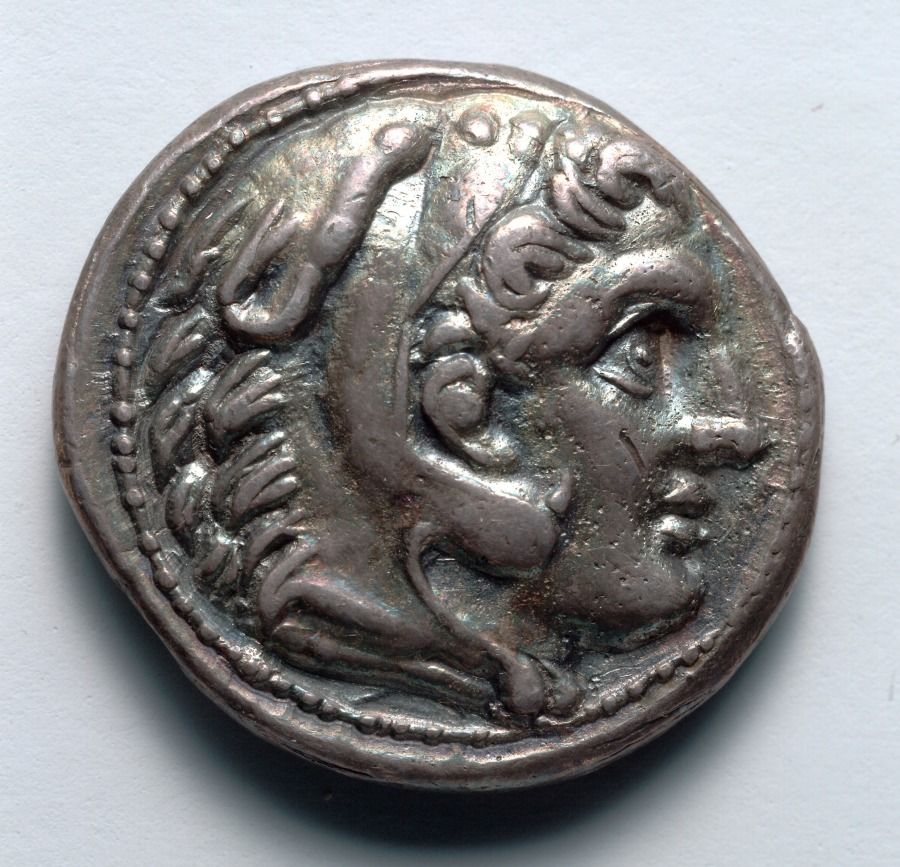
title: Tetradrachm: Head of Young Herakles (obverse); Zeus (reverse)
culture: Greek, Macedonian, minted at Amphipolis (Macedonia), reign of Alexander III [The Great]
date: 336–323 BCE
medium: silver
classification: Coins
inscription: Λ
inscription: ΑΛΕΞΑΝΔΡΟΥ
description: On this coin, the head of a youthful Herakles, wearing his lion-skin, appears on the obverse, with his father Zeus, king of the gods, seated on the reverse. For Alexander III (the Great), coins like this one projected power. Thus, while their attributes (lion-skin, eagle, scepter) identify hero and god, the inscription ΑΛΕΞΑΝΔΡΟΥ (of Alexander) identifies the leader.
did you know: Alexander the Great claimed descent from Herakles and Zeus, picturing them both on his coinage.